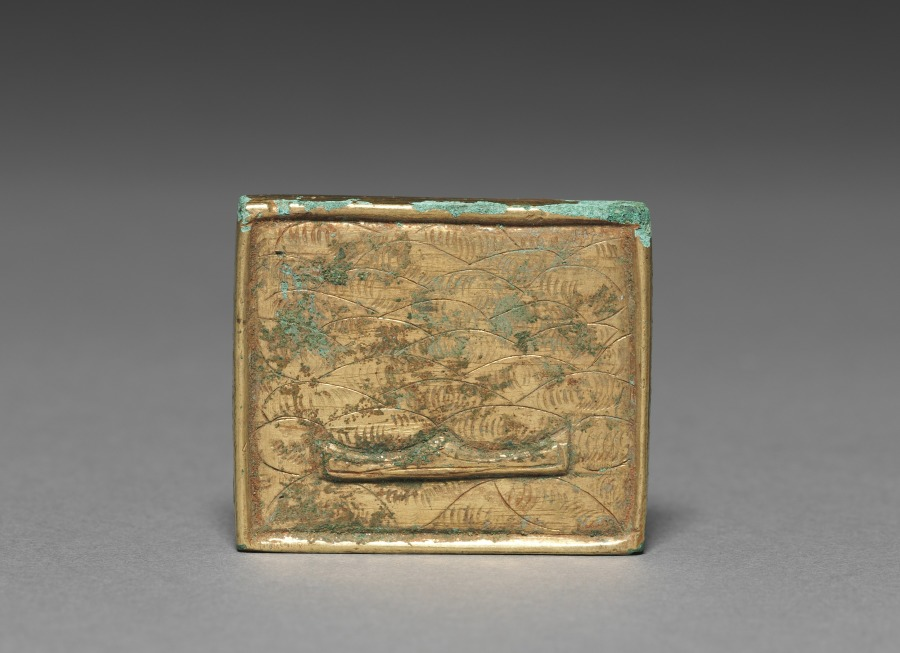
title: Belt Ornament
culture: Korea, Goryeo dynasty (918–1392)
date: 918–1392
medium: bronze gilt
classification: Metalwork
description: Metallurgy advanced remarkably in the Goryeo period (918-1392), explaining why a large quantity of sophisticated metal artifacts with delicate designs were used not only as daily accessories but also as burial goods. Belt ornaments like this example were fixed to leather belts.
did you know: The Japanese antique dealer Yamanaka & Company, which opened its branches in New York (1895) and Boston (1899) sold small Korean archaeological materials such as this belt ornament to American collectors in the early 20th century.